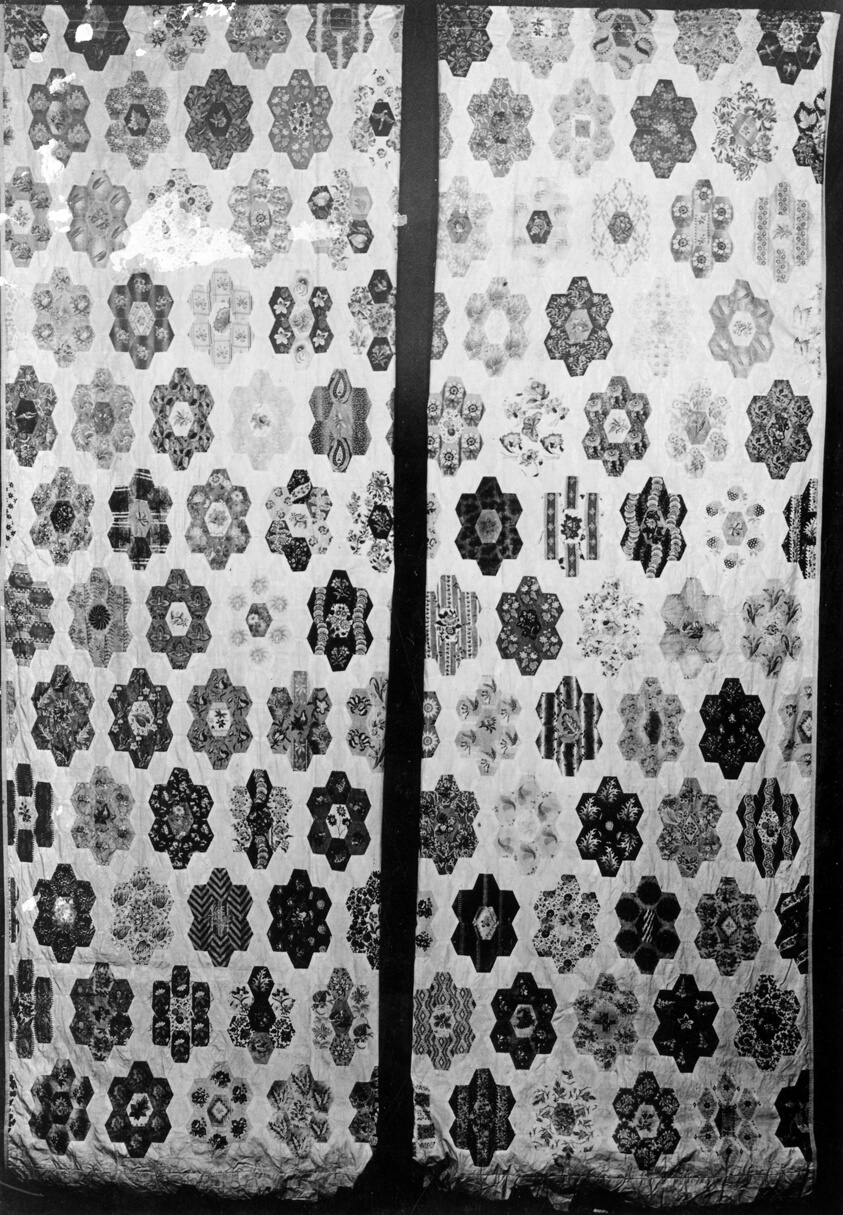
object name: Textile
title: Curtain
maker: England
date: 18th/19th century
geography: England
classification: textile; needlework (visual works)